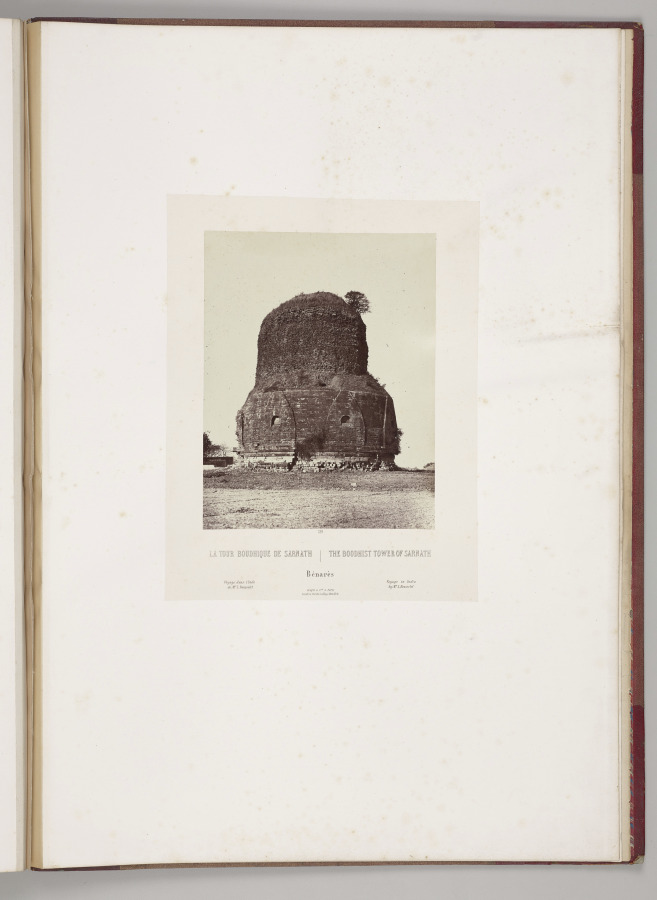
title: The Boodhist Tower of Sarnath, Bénarès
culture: France, 19th century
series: India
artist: Louis-Théophile Marie Rousselet (French, 1845–1929)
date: 1865–68, published 1869–70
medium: Albumen print from glass plate negative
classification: Photograph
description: Concerned that his drawings did not do justice to the splendor of India’s monuments, Rousselet learned photography in India that year, a remarkable accomplishment. He proved to be a talented photographer with a sophisticated sense of composition. The scenes in this volume sweep across sites of Sultanate, Rajput, and Mughal power in northern India, from the sacred Hindu city of Varanasi on the Ganges River to Alwar in Rajasthan. Also included are several scenes of industry and portraits of Indian rulers.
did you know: Louis Rousselet described himself as a “scientific traveler” when he went to India alone at age 18 in 1863 and stayed into 1868.